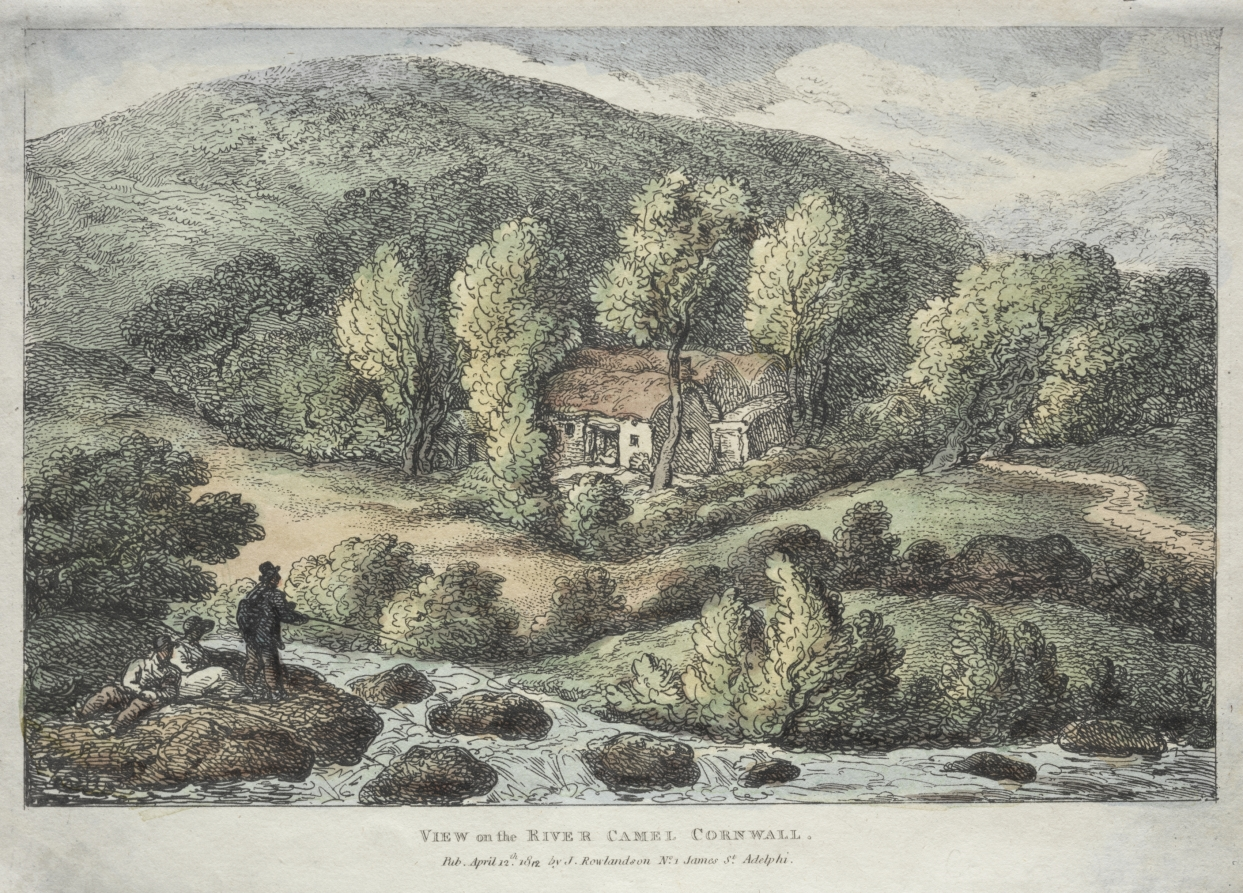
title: Views in Cornwall: View on the River Camel, Cornwall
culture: England, 19th century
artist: Thomas Rowlandson (British, 1756–1827)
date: 1812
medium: etching, hand colored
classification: Print